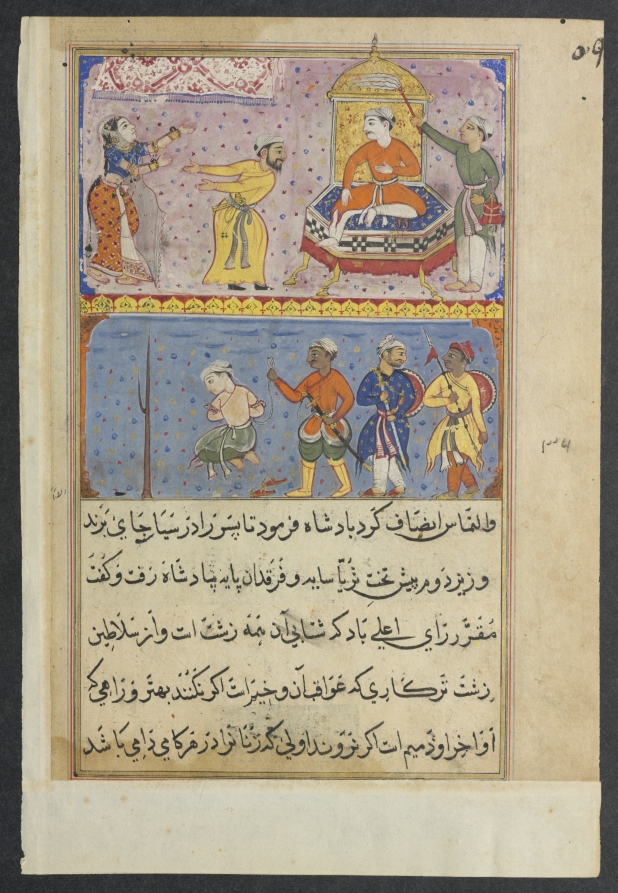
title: The prince, once reprieved, is returned to the palace of execution a second time on the plea of the king’s handmaiden, from a Tuti-nama (Tales of a Parrot): Eighth Night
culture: Mughal India, court of Akbar (reigned 1556–1605)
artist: Gujarati (Indian, active 1550s-1590s)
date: c. 1560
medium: gum tempera, ink, and gold on paper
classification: Painting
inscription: aiẓan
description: Above, the handmaiden addresses the king, who is seated on a large throne. She begs once again for the prince to be executed for a crime he did not commit. In the lower register, the bound prince kneels, barefoot and surrounded by armed guards. His execution will be stopped for the second time by one of the king’s viziers.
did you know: The vizier tells the king a story about the wicked ways of women.